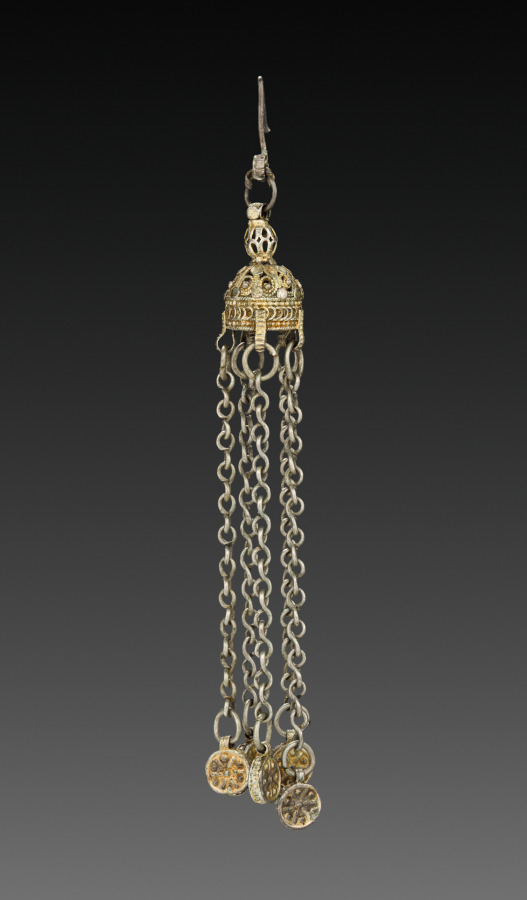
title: Earring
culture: Bulgaria, 19th century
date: 1800s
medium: silver gilt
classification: Jewelry